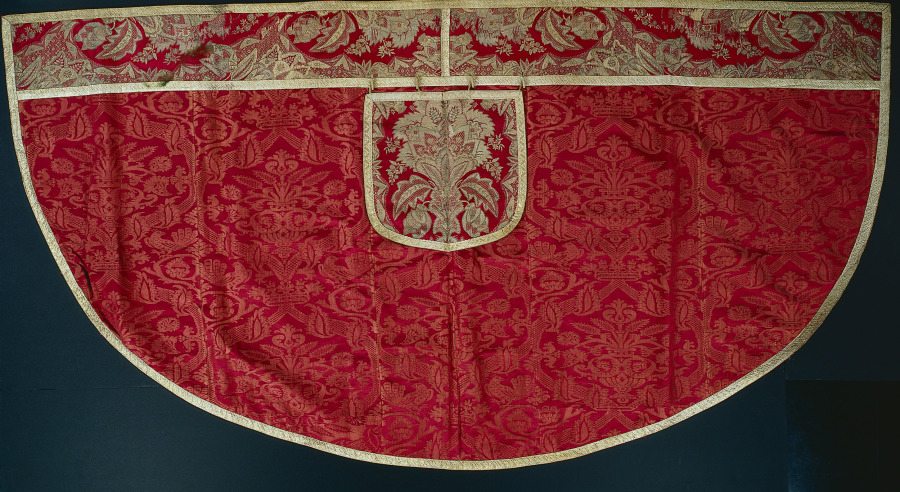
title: Priest's Red Cope, Orphrey and Hood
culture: France and Italy, Orphrey and hood: France, Lyon, Regency period, 1715-1725; Cope: Italy, late 16th - early 17th century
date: late 1500s - early 1600s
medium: Cope: damask weave, silk; Orphrey and hood: brocade, silk and silver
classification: Textile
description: Liturgical copes are used for processions especially by those who assist the celebrant. They evolved from a secular outer garment with a hood to protect the wearer from wind and rain. Hoods remained although they became decorative and nonfunctional. This Italian silk damask features large symmetrical bouquets in urns within curved lattices bearing crowns flanked by birds. The French orphrey band, or ornamental border, along the front edges and hood incorporates small ornament associated with prestigious lace amid the formal foliate design.